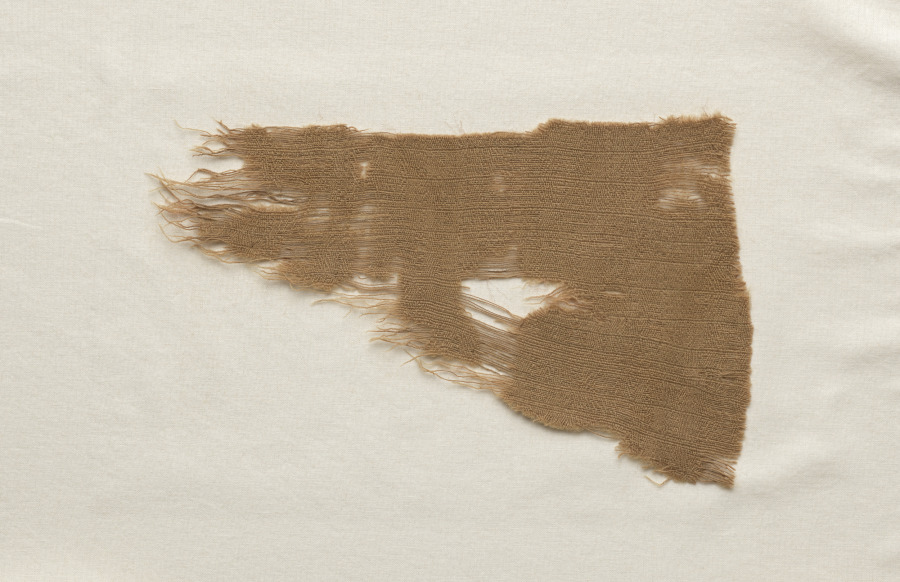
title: Cloth of Twill Weave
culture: Syria, Dura-Europos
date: 200s CE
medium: wool: 2-2 twill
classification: Textile